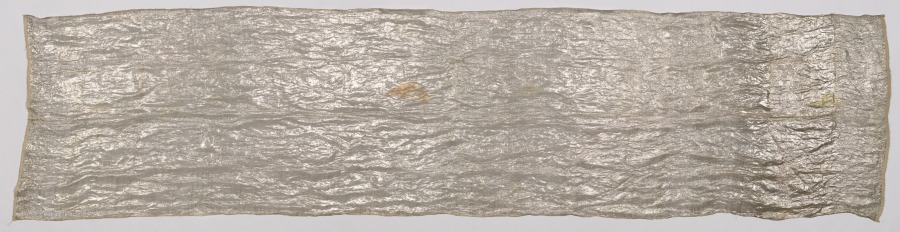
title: Length of Cotton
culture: India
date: early 1900s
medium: cotton, metallic thread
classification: Textile